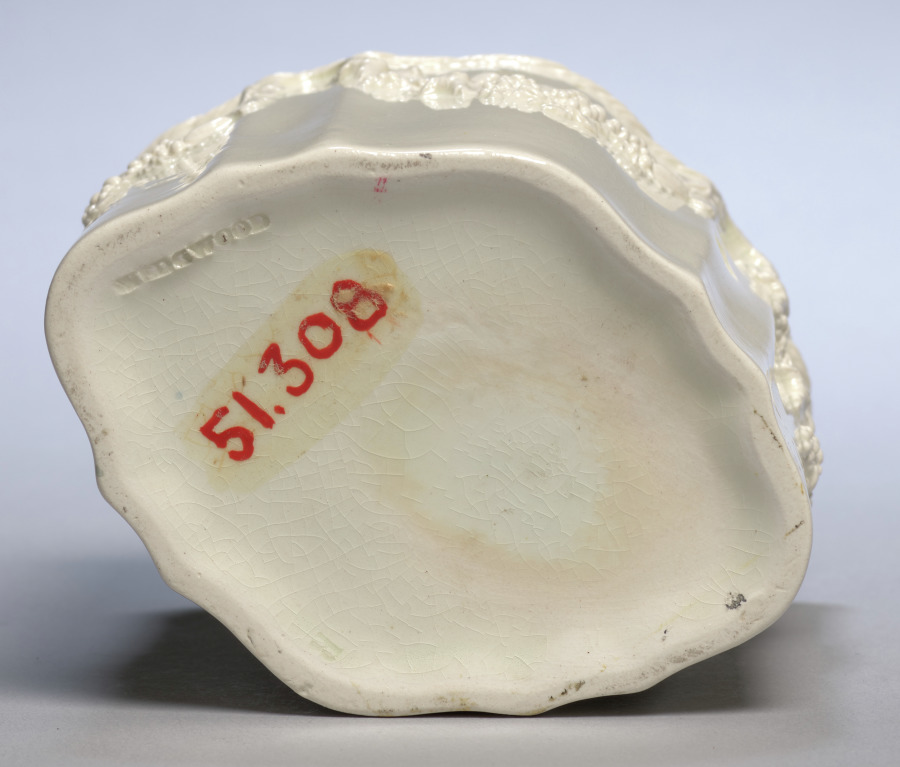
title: Teacaddy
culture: England, Staffordshire, 18th century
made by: Wedgwood Factory (British)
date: late 1700s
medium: cream-colored earthenware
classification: Ceramic